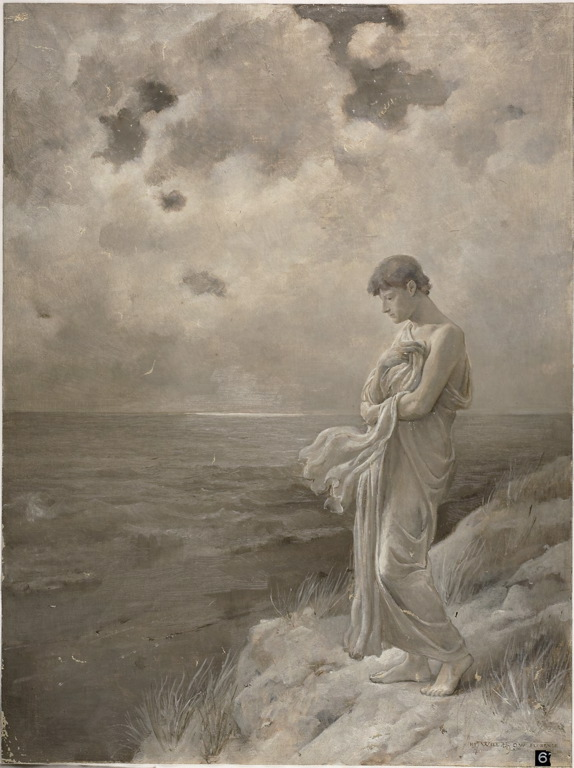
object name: Painting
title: Sonnet: "When I have fears that I may cease to be"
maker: Will Hicock Low (American, 1853-1932)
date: 1887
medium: Oil on canvas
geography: United States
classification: drawings (visual works); prints and drawing; painting